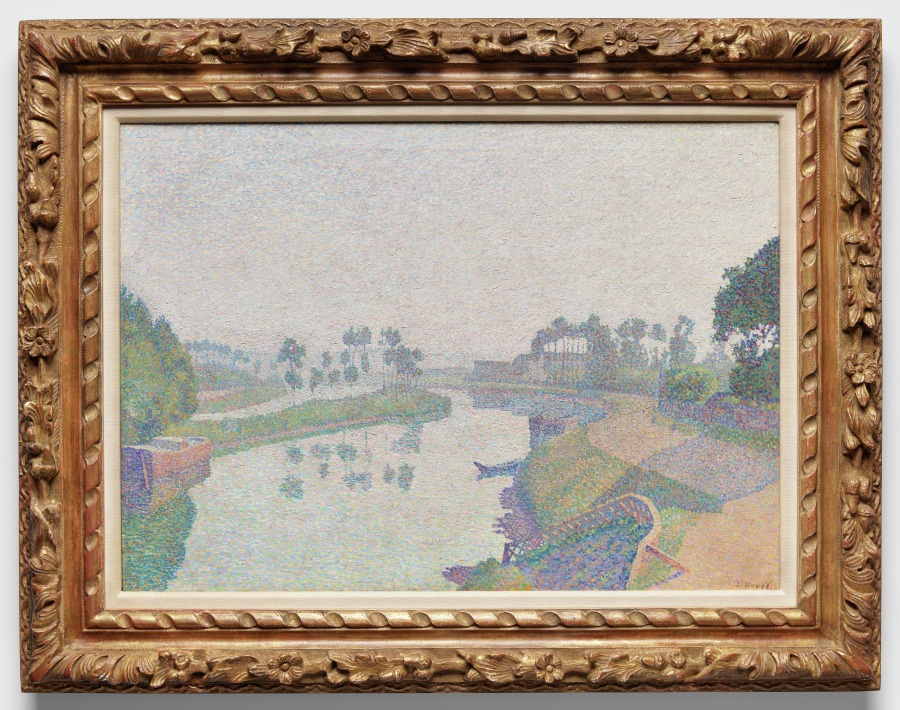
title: Banks of the Oise at Dawn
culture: France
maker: Louis Hayet (French, 1864–1940)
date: 1888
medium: Oil on canvas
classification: Painting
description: Louis Hayet was an important, early practitioner of Neo-Impressionism, or Pointillism, the practice of applying small strokes or dots of paint so that from a distance the hues visually blend together and create an intense sensation of color and light. Notice the way in which Hayet painted the pale dawn sky—and its reflection in the River Oise—with strokes of pink, orange, blue, yellow, and green paint. When seen at a distance, the effect is of early morning, before the sun has fully risen.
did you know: Hayet received considerable critical praise for his original idea of developing a Neo-Impressionist color chart that incorporates gray tones.